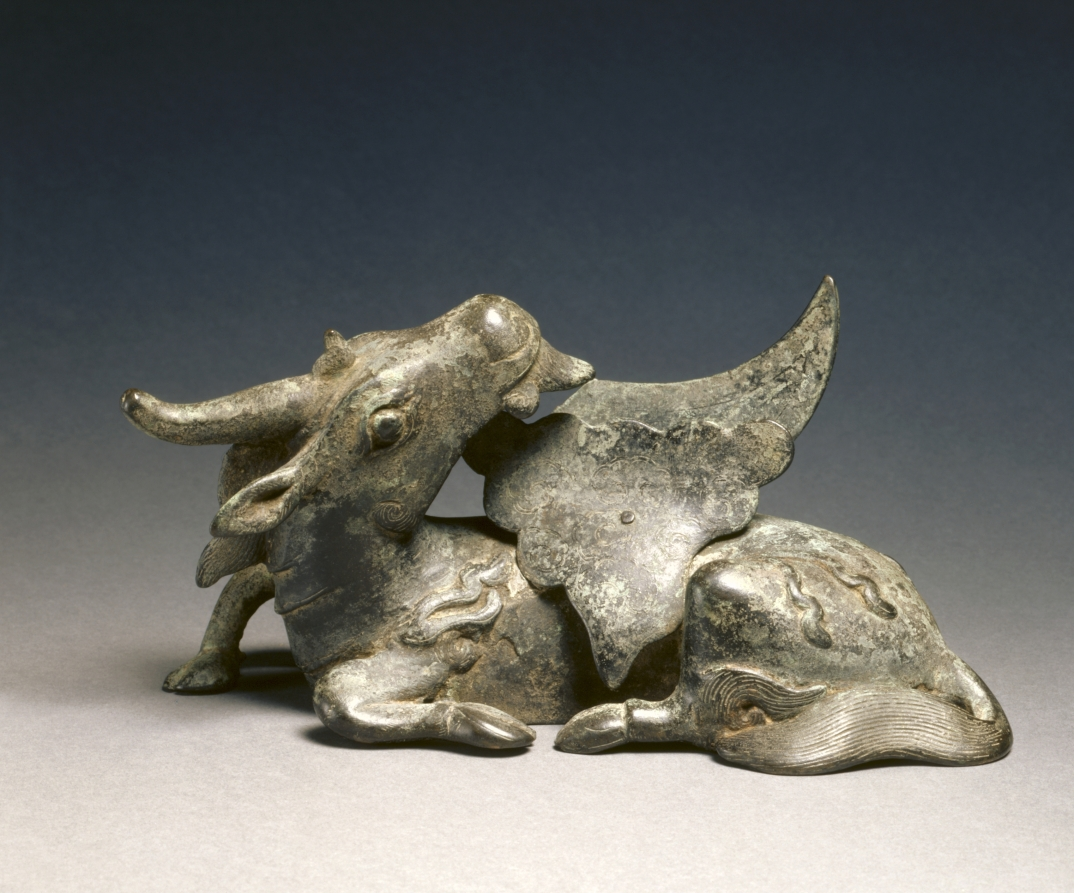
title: Mirror Stand in the Shape of a Djeiran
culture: China, Qing dynasty (1644-1911)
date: mid 1600s-early 1900s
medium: bronze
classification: Metalwork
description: This mirror stand is the in shape of a recumbent djeiran, or Central Asian antelope. Commonly appearing on Sogdian silver from the 600s onward, the djeiran motif migrated via the trade routes to northern China. There, during the Jin and Yuan (1279–1368) dynasties, it was very popular and always depicted with the moon supported by clouds. Chinese writers often identify the djeiran as the mythical rhinoceros (xi'niu) that is said to gaze at the moon, or as the cow of Wu "panting upon seeing the moon." When the stand originally held a mirror, the animal would appear to be looking at the moon.